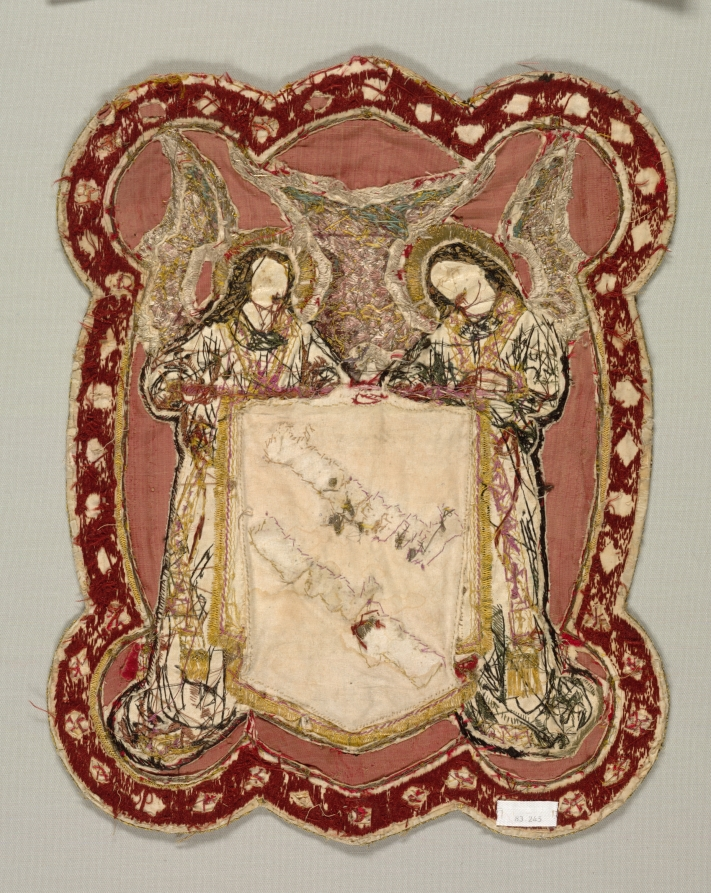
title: Silk Embroidery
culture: Austria ?, 19th century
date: 1800s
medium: embroidery, silk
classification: Embroidery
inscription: inscribed on the cloth banner held by two angels: "Ecce panis angelorum."